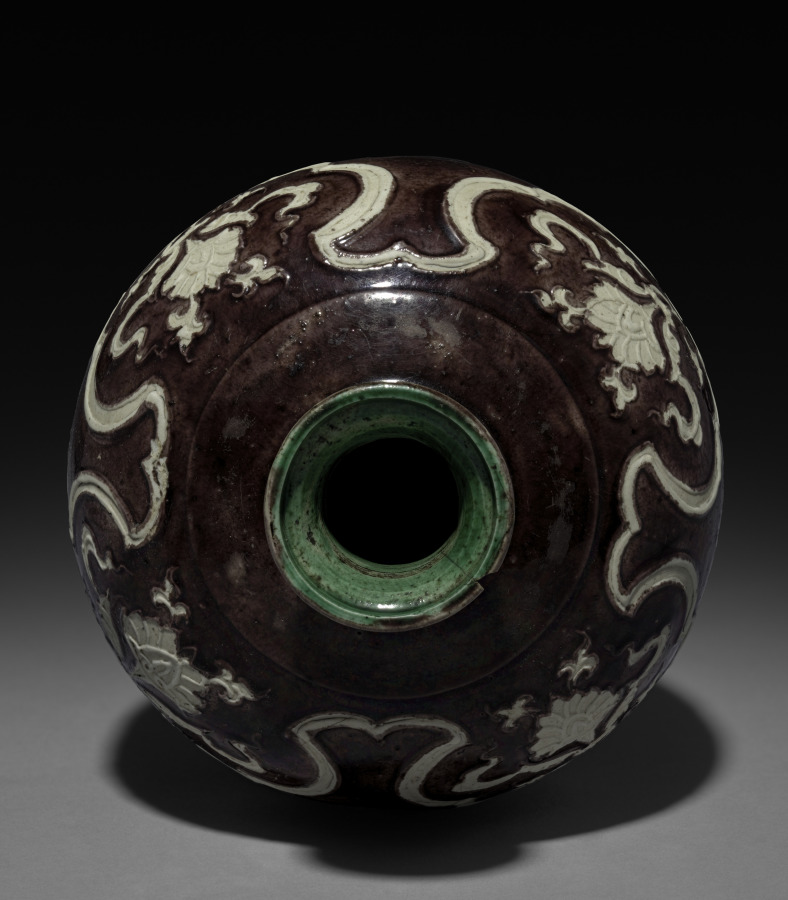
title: Vase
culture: China, Jiangxi Province, Ming dynasty (1368–1644)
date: late 1400s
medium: porcelain, Fahua ware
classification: Ceramic